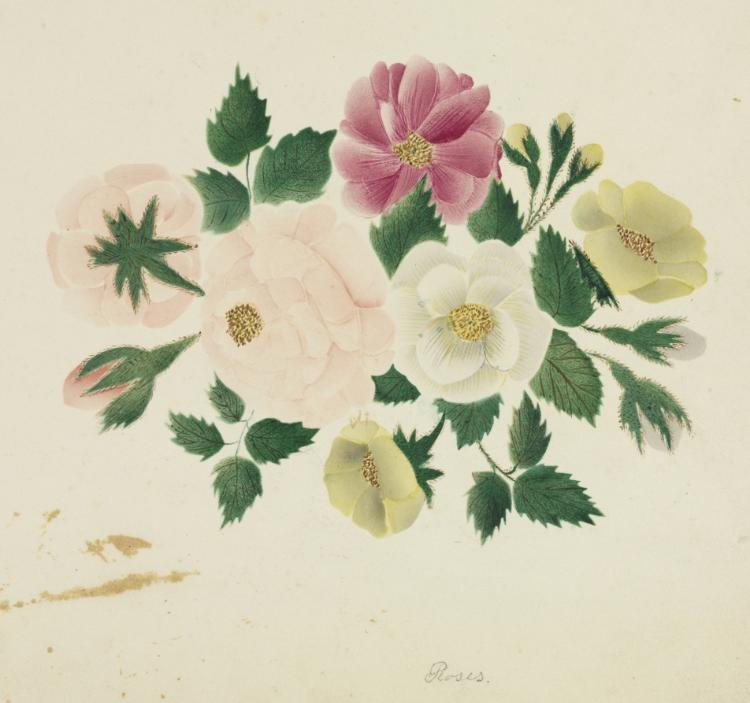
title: June Roses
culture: America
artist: Mary Altha Nims (American, 1817–1907)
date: 1800s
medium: watercolor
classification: Drawing